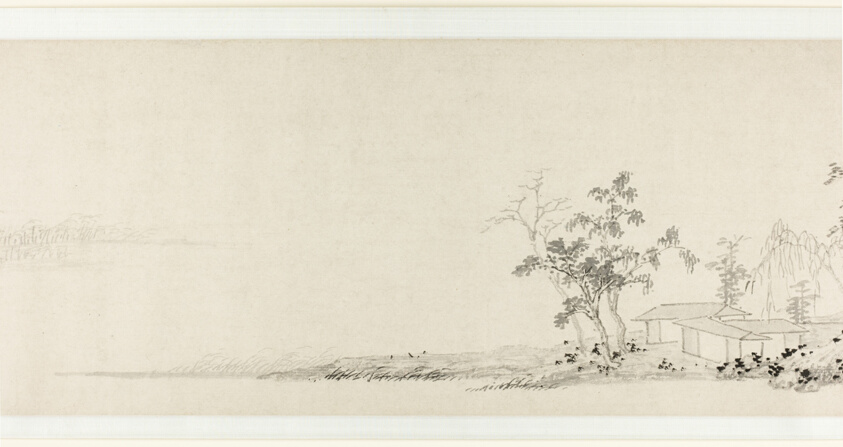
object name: Painting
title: Return to Stone Lake 石湖歸棹圖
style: Chinese (culture or style)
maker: Shen Zhou, 沈周; Chinese, 1427-1509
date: Ming dynasty (1368–1644), dated 1466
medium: Handscroll; ink on paper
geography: China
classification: handscroll; painting; asian art